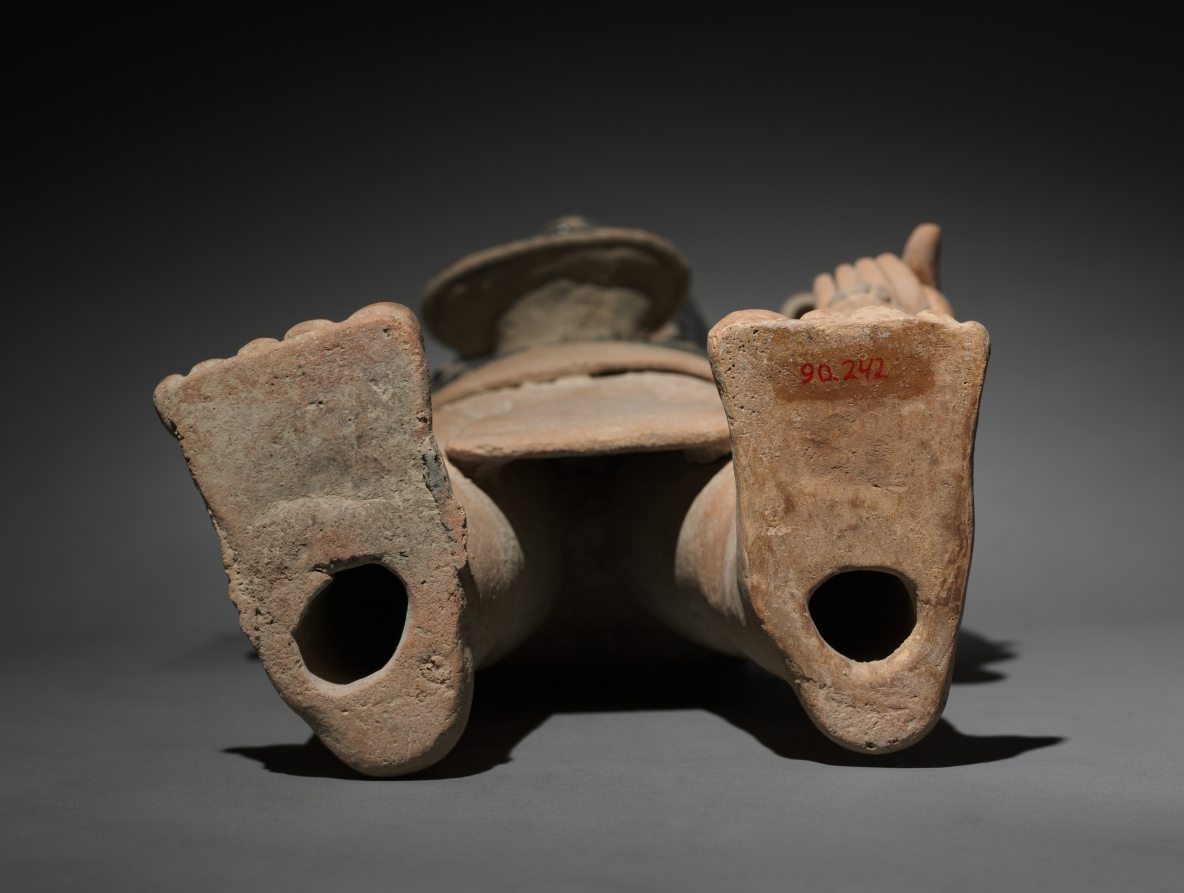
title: Standing Male Figure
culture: Mexico, Gulf Coast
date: 300–900 CE (thermoluminescence date, 240–945 CE)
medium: earthenware, asphalt and resin paint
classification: Sculpture